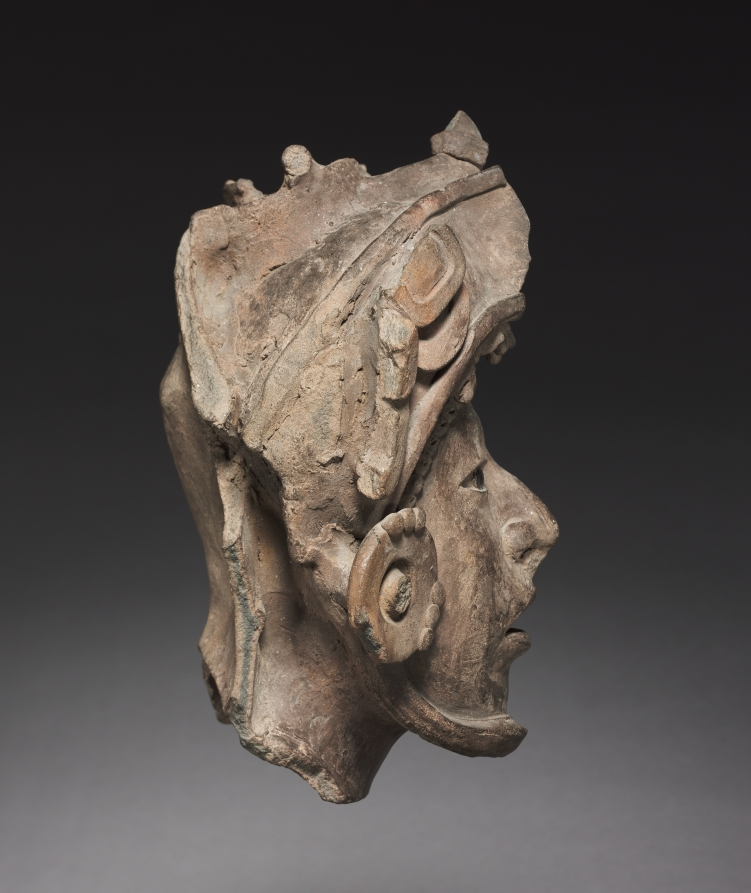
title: Head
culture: Mexico, Classic Veracruz, 7th-10th Century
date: c. 600–900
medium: earthenware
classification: Sculpture